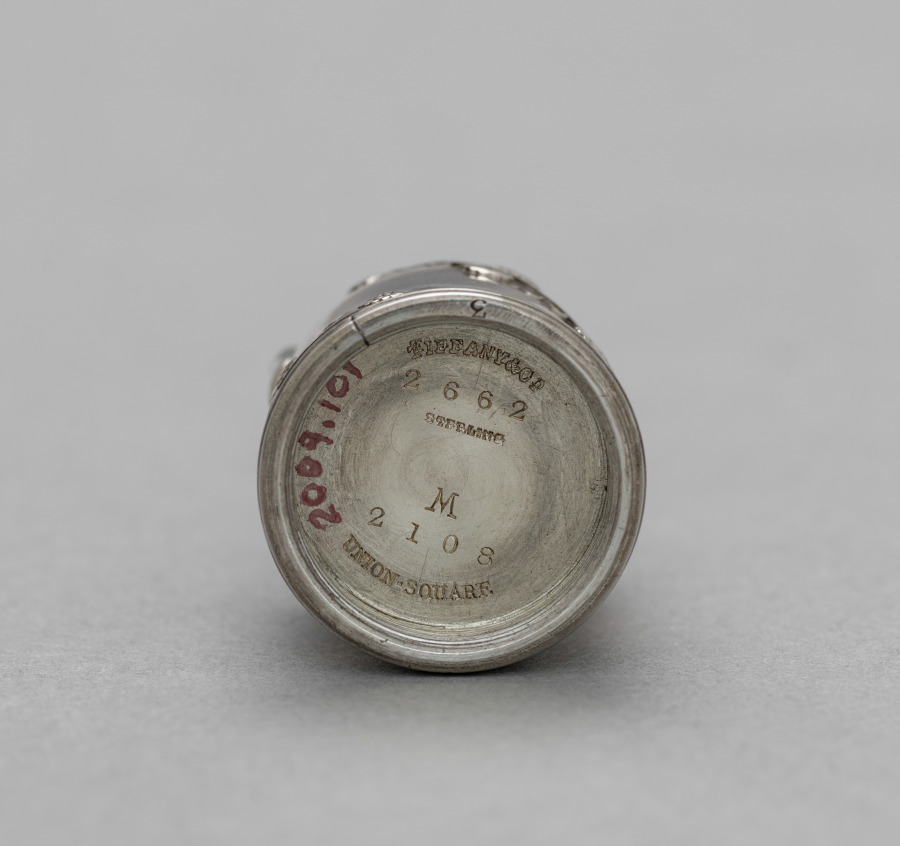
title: Scent Bottle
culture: America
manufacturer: Tiffany & Co. (America, New York, est. 1837)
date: c. 1860–70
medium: silver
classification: Silver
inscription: Inside mark: Tiffany & Co. 2662 (...) - this is too small to read M2108 Union Square